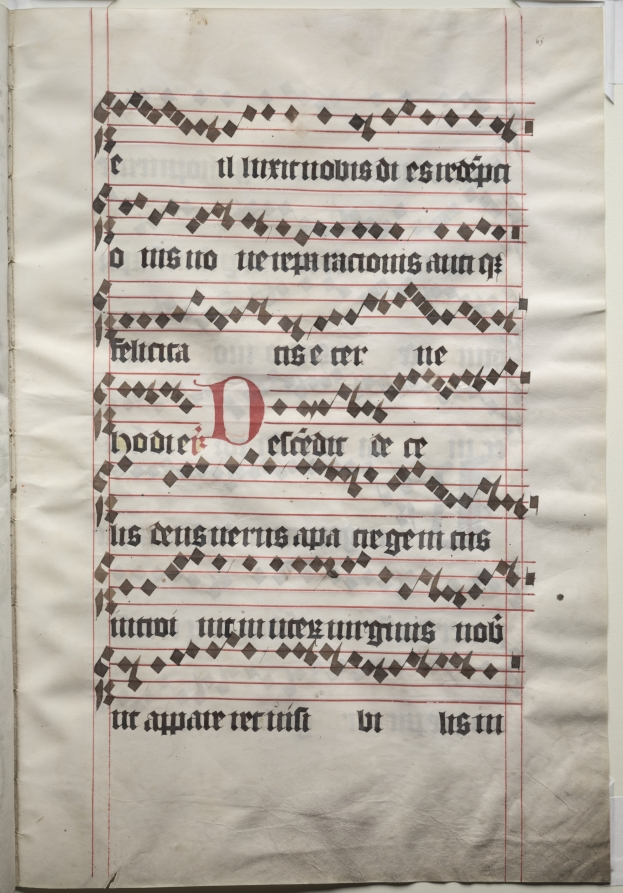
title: Bifolio from an Antiphonary: Historiated Initial O with the Nativity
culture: Bohemia, Prague, 15th century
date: early 1400s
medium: ink, tempera, and gold on parchment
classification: Manuscript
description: This splendid bifolium (a sheet folded in half to form two leaves) once formed part of an important antiphonary produced for an unidentified Benedictine monastery in Bohemia. With its rich illumination, it provides an important example of Bohemian painting during the opening years of the 15th century as well as painting in the city of Prague, one of the great court centers of Europe. The decoration of the leaf is dominated by a majestic initial O that depicts the Nativity. A scene in the background shows the angel Gabriel’s Annunciation to the Shepherds. The initial itself is placed within a square frame outside of which a single Benedictine monk observes the sacred event. The initial introduces the Latin chants for the first vespers of Christmas Day: O iuda et iherusalem (“Oh Judea and Jerusalem”). Framing the text are luxurious, scrolling acanthus leaves. Within the upper margin, two prophets emerge from the lush, foliated tendrils to observe the nativity below. In this way, the foretelling of the birth of Christ in the Old Testament is established visually.